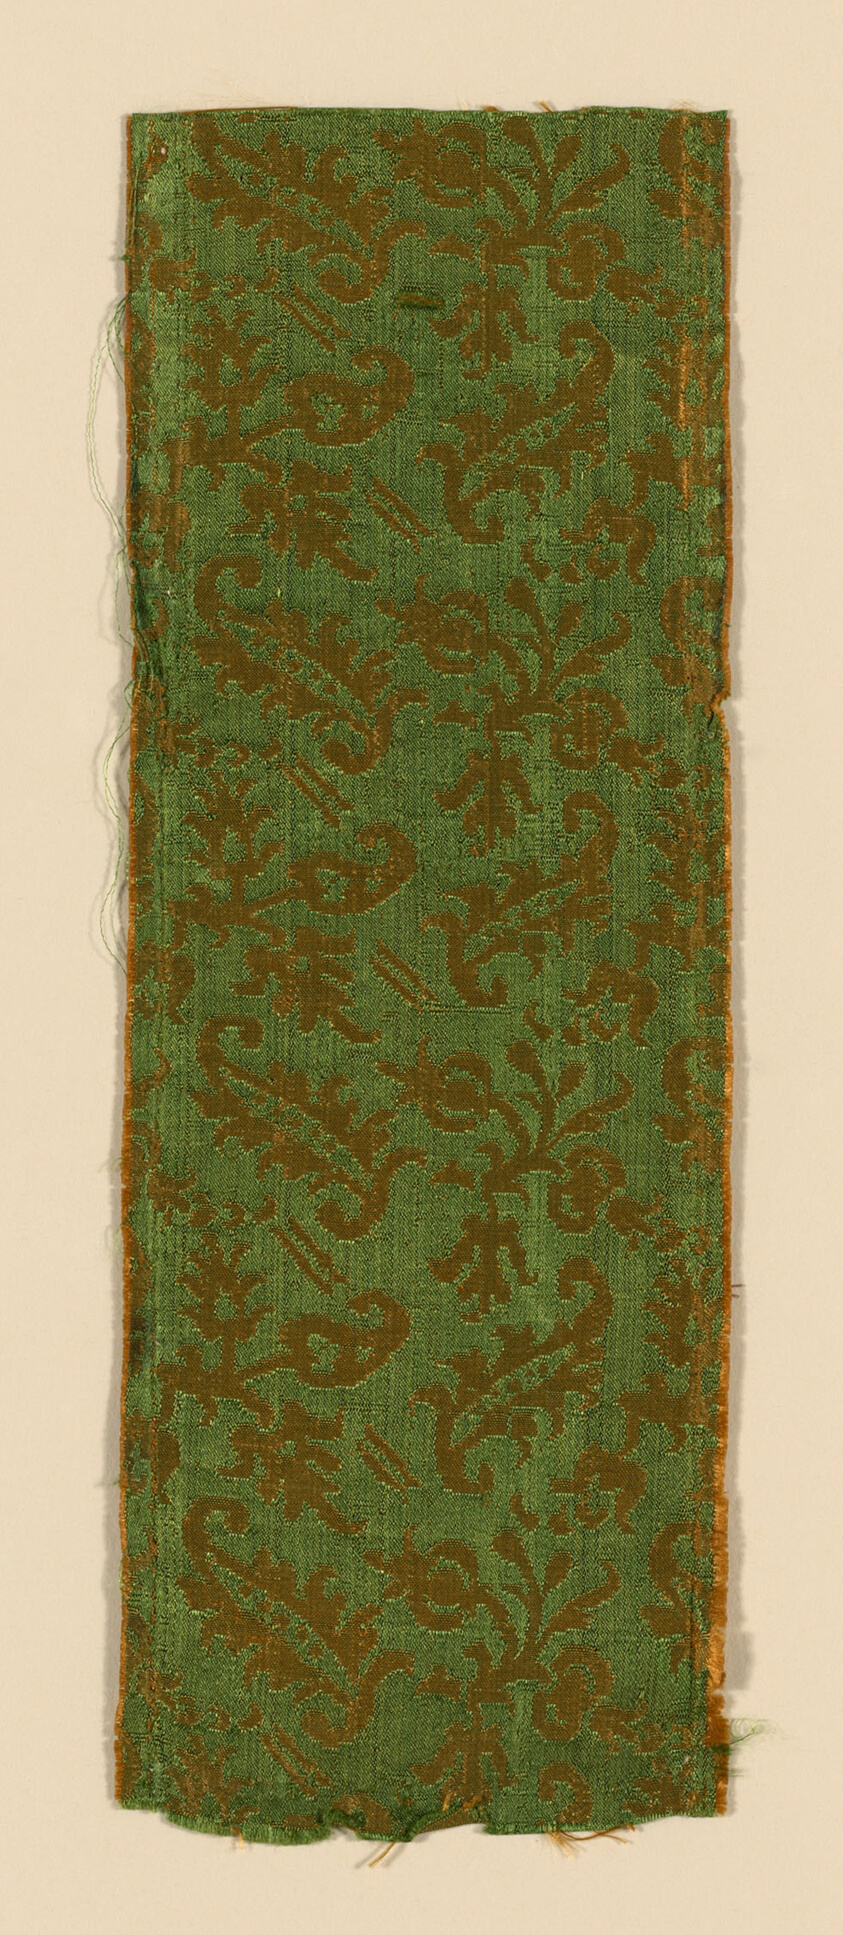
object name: Textile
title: Fragment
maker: Italy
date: 1650/1700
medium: Silk, satin damask weave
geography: Italy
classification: textile; weaving